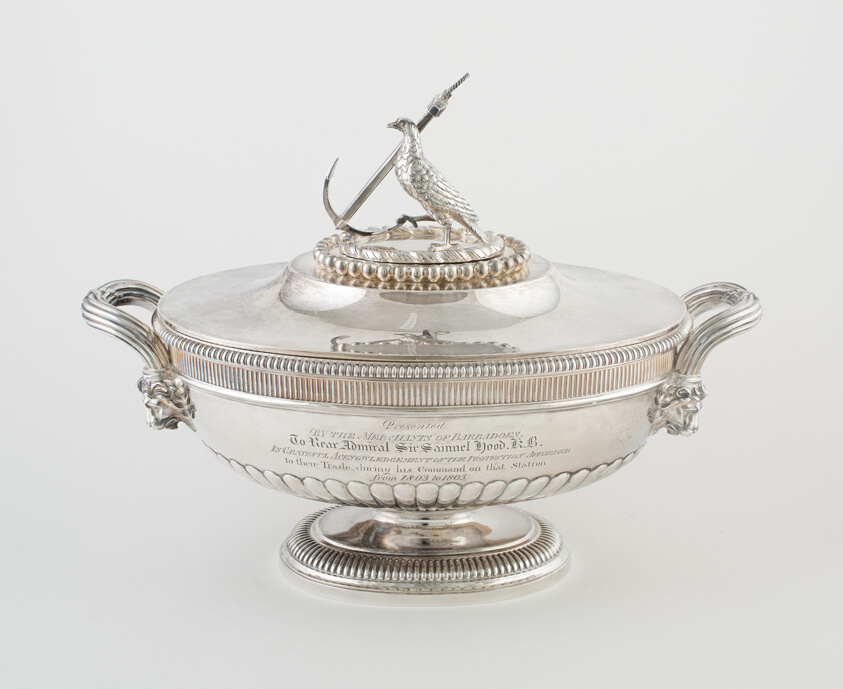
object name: Metalwork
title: Soup Tureen with Cover from the Hood Service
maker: Paul Storr; English, 1771-1844; London, England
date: 1806/07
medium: Sterling silver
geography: England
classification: silver; metalwork; european decorative arts